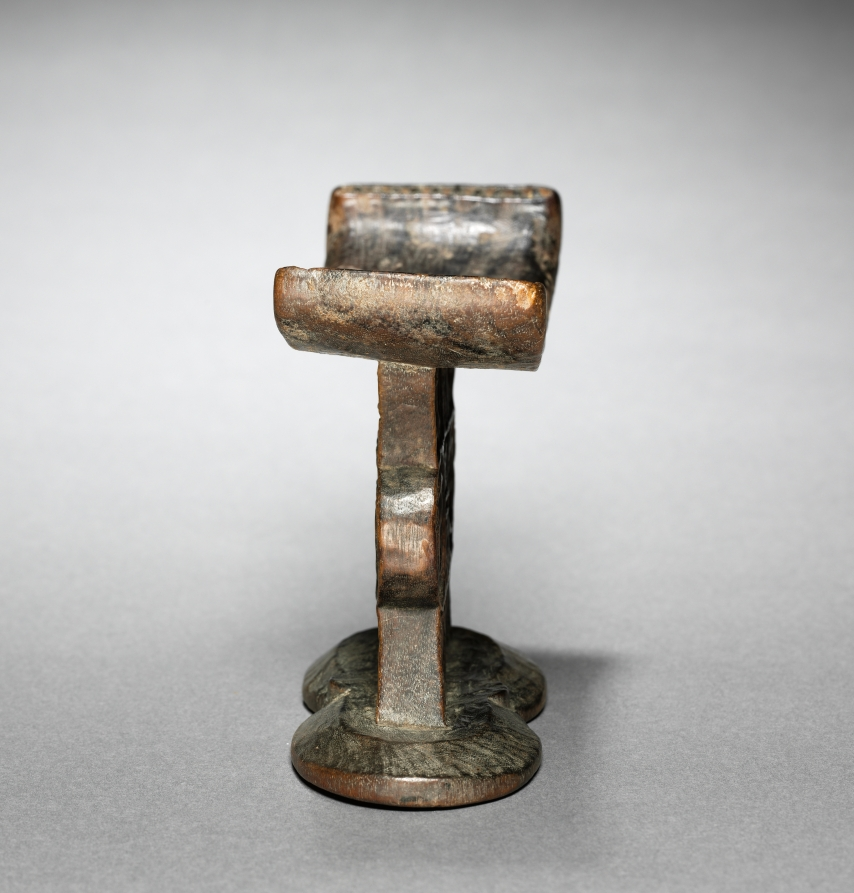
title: Headrest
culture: Africa, Southern Africa, Mozambique, Shona-style maker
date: 1900s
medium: Wood and colorant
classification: Furniture and woodwork